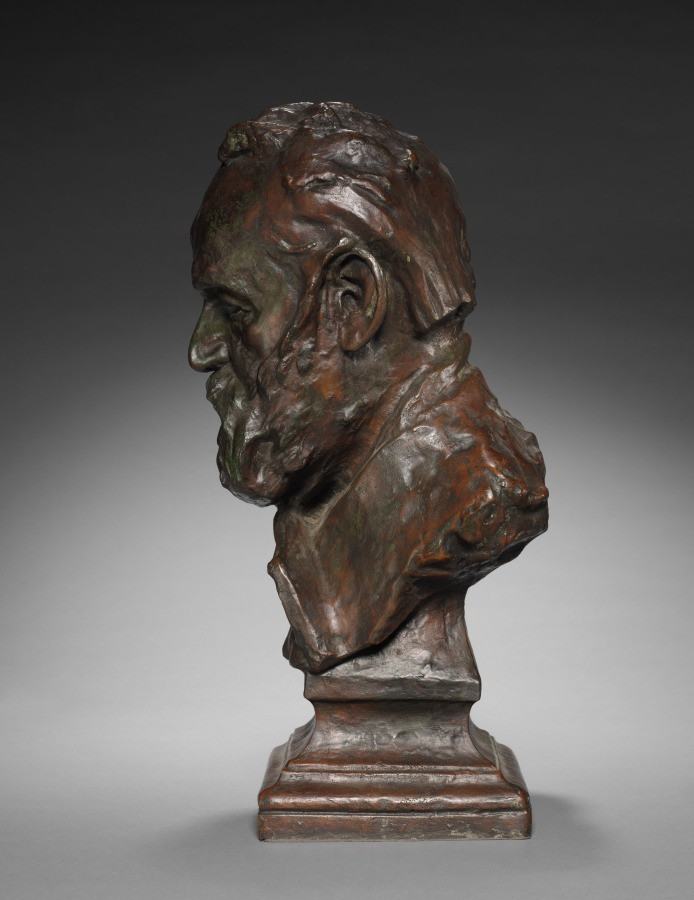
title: Bust of Victor Hugo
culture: France, 19th century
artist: Auguste Rodin (French, 1840–1917)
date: 1883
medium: bronze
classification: Sculpture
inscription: Signed beneath fold of drapery to left: "A. Rodin"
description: Unlike most of Rodin’s portraits, the bust of Victor Hugo (1802–1885) was made from memory because the famous French writer refused to sit for the artist. Among Hugo’s best-known novels are The Hunchback of Notre Dame (1831) and Les Misérables (1862).